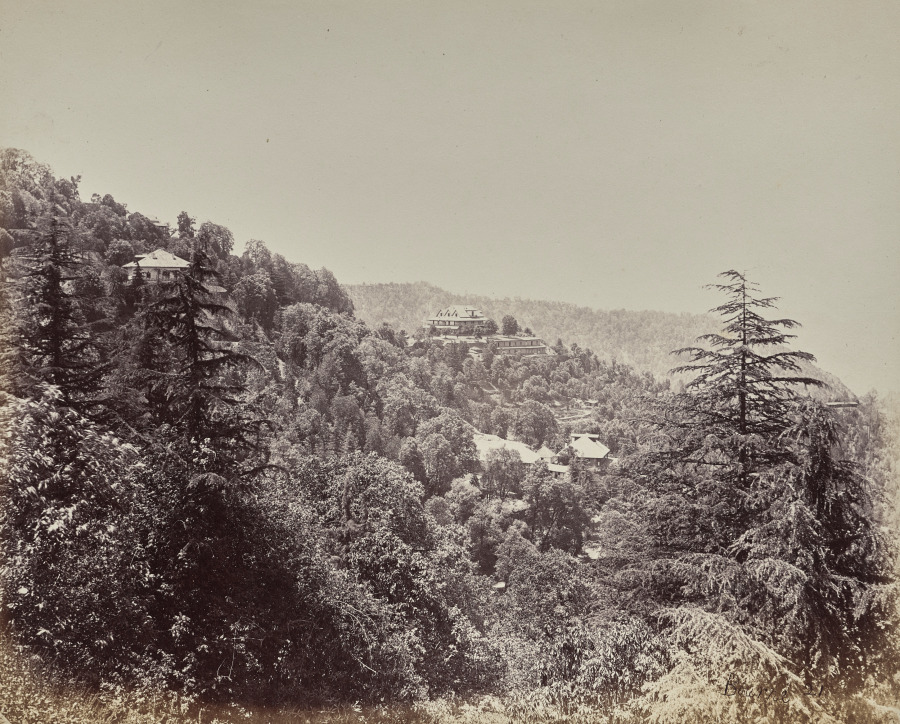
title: Shimla. The Yarrows and Neighboring Hills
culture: England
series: Photographs of Northern India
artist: Samuel Bourne (British, 1834–1912)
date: 1863–70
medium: albumen print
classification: Photograph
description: The 50 images in this album, all taken in the 1860s, move from the hill towns of the Himalayas down to cities including Lahore (now in Pakistan), Delhi, Lucknow, Agra, Benares (now Varansi), and Calcutta (now Kolkata). Architectural studies of major monuments offer valuable historical records of what sites such as the Taj Mahal and the imperial mosque of the Mughal emperors in Delhi looked like before twentieth-century restorations.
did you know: Samuel Bourne, the author of most the images in this album, was a banker in England before he moved to India to become a professional photographer.